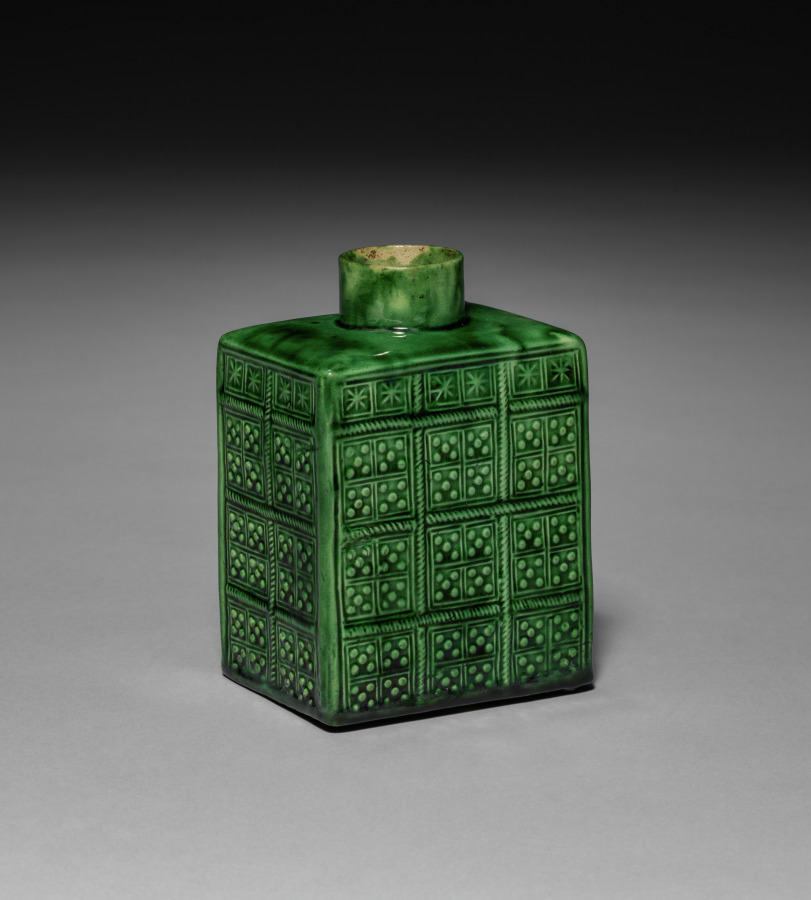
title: Tea Caddy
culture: England, 18th century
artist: Staffordshire Factory (British)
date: c. 1750–1800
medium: earthenware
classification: Ceramic